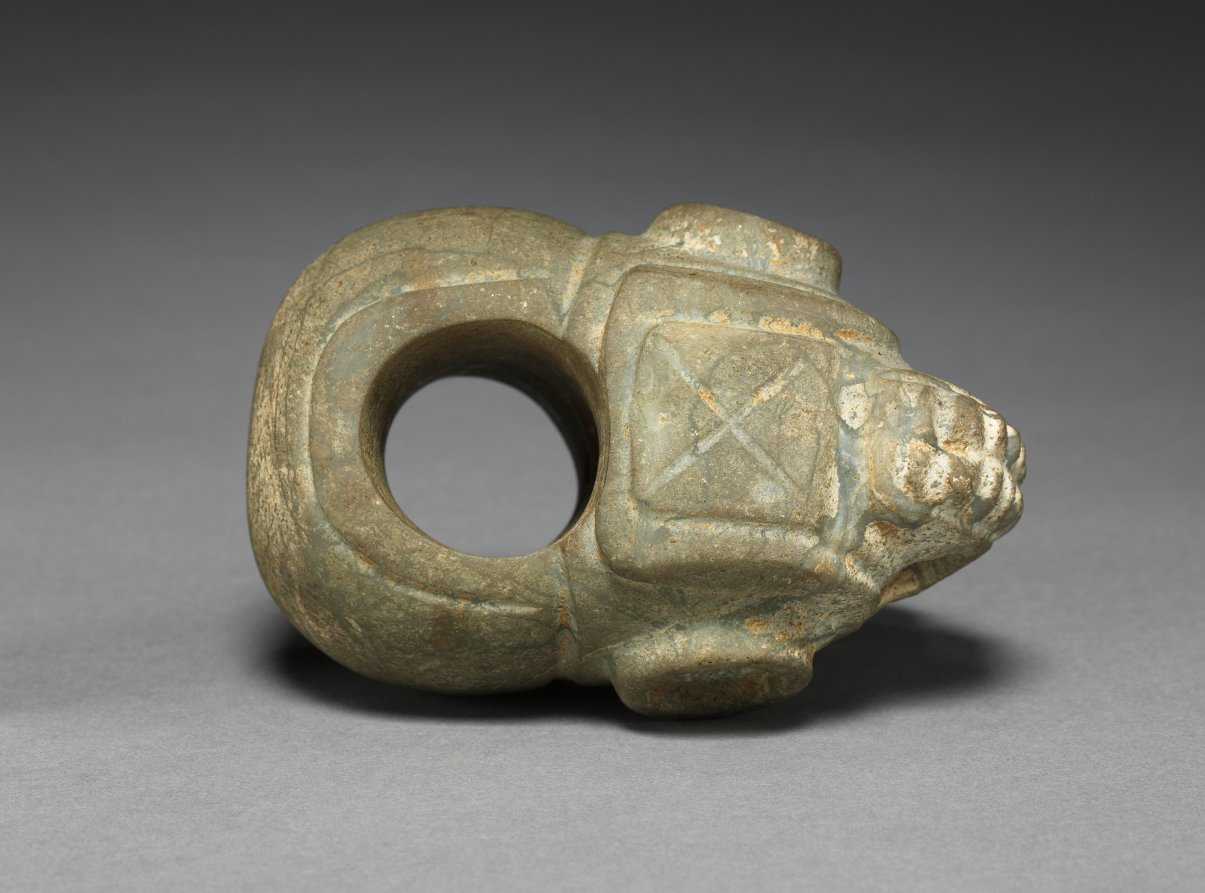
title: Ceremonial Mace (Club) Head: Bird (Male Curassow?)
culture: Costa Rica, Southern Nicoya region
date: 300 BCE–600 CE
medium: stone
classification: Sculpture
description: Probably once mounted on wooden shafts, these objects could have served as symbols of chiefly authority, group insignia, the heads of ceremonial weapons, or all three. They eventually were placed in elite graves. The bird may be a male curassow and the feline, a jaguar.